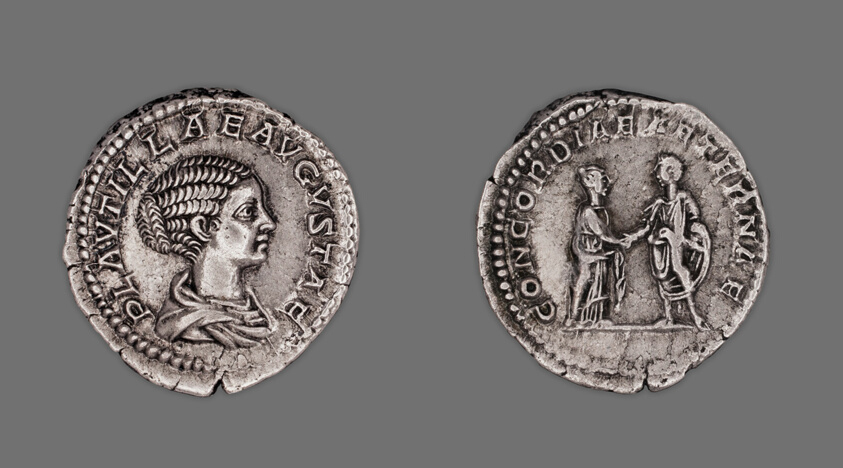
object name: Coin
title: Denarius (Coin) Portraying Plautilla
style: imperial (roman), roman (ancient, style or period)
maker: Roman, minted in Rome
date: 202-205, issued by Septimius Severus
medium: Silver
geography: Rome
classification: coin; ancient art